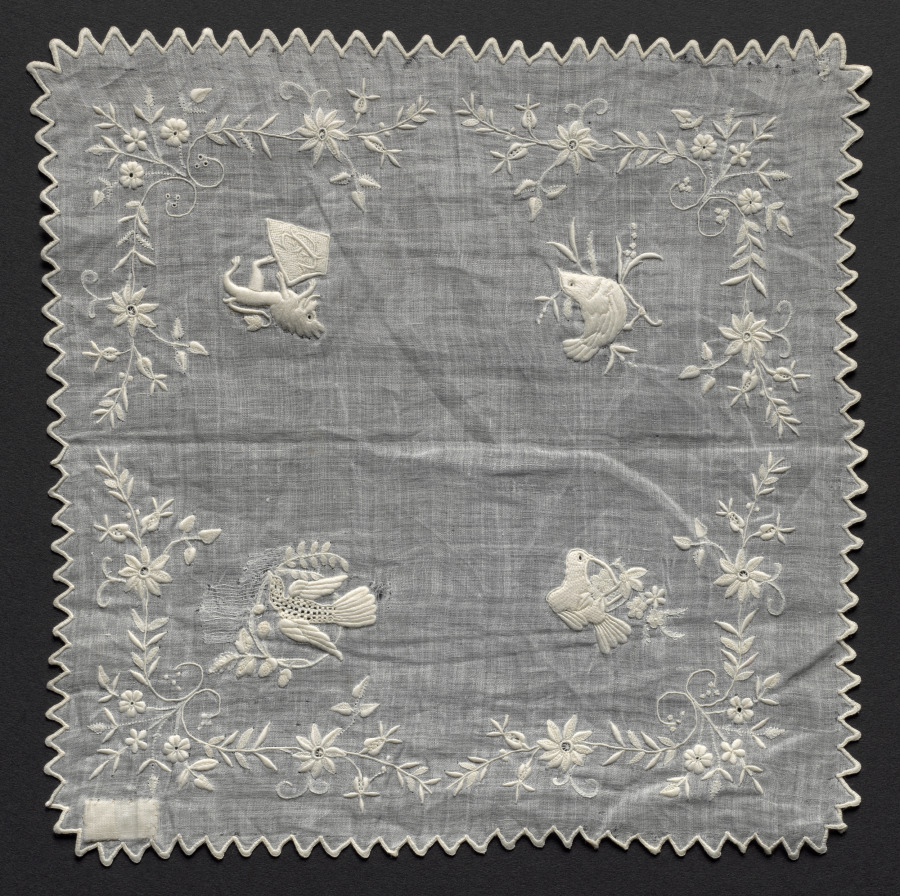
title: Handkerchief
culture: France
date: 1800s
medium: Plain weave linen, embroidered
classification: Embroidery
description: The embroidery in three of four corners of this handkerchief consists of birds. In the fourth corner are a spray of flowers and a lion with a shield on which is monogramed the initials G E.